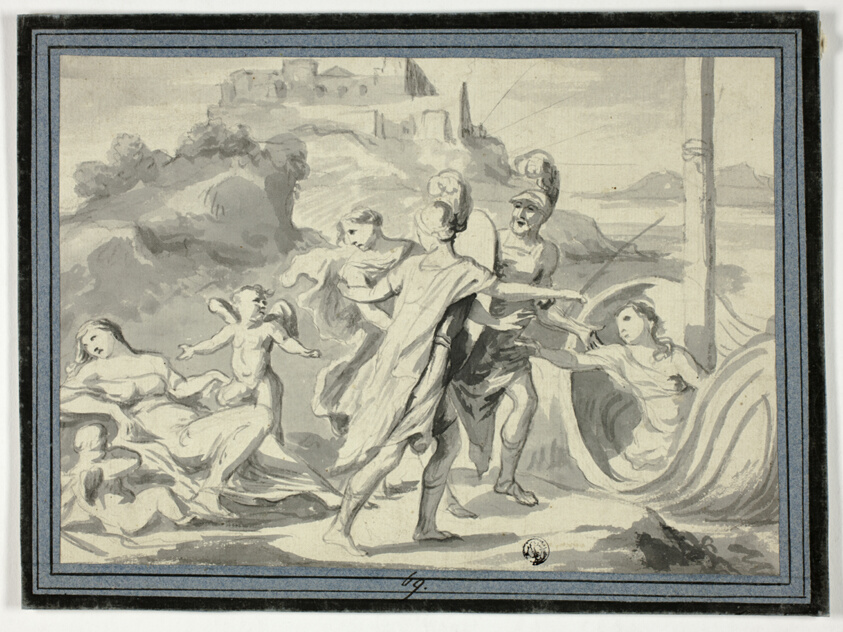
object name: Drawing and Watercolor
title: Rape of Helen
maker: Unknown Artist; French or Scottish, n.d.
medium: Brush and black and gray wash, over traces of charcoal, on ivory laid paper, laid down on ivory laminate board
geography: France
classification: ink or chalk wash; drawings (visual works); prints and drawing